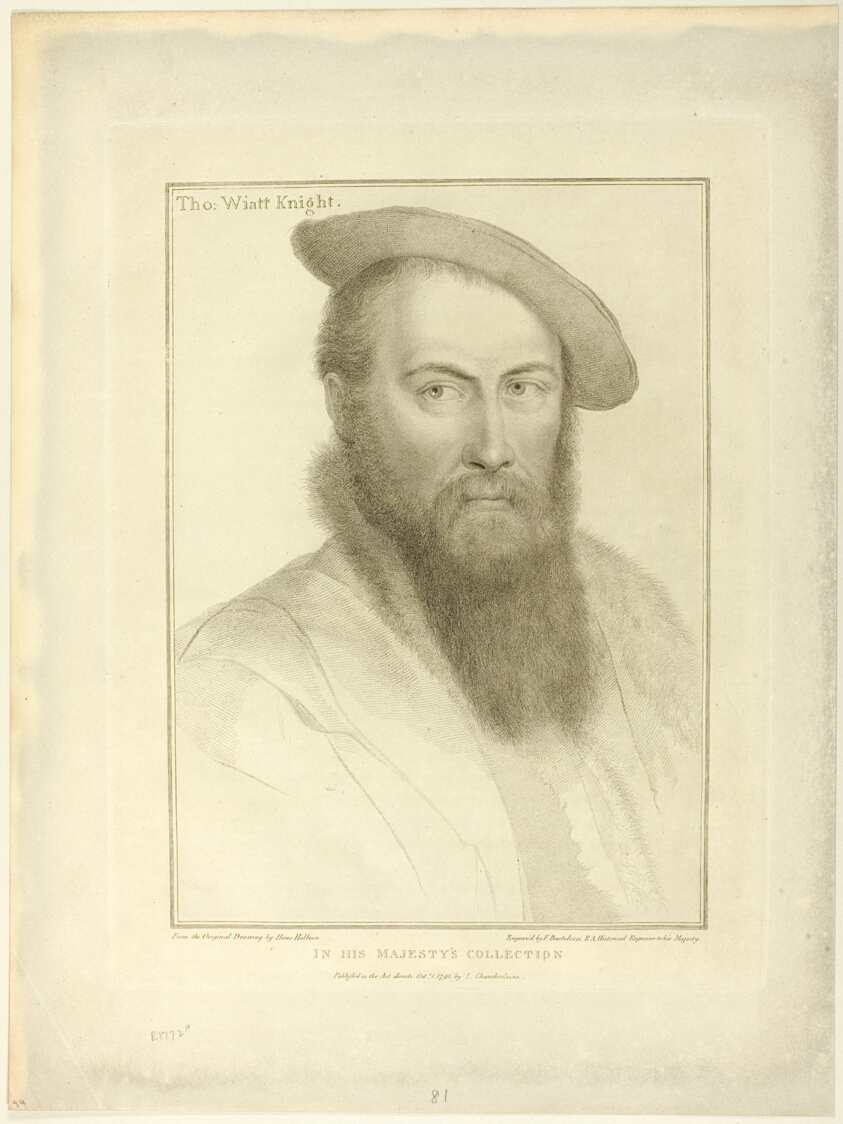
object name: Print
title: Sir Thomas Wyatt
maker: Francesco Bartolozzi (Italian, 1727-1815); after Hans Holbein the younger (German, 1497-1543)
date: October 1, 1793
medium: Stipple engraving on ivory wove paper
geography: Italy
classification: engraving; print; prints and drawing